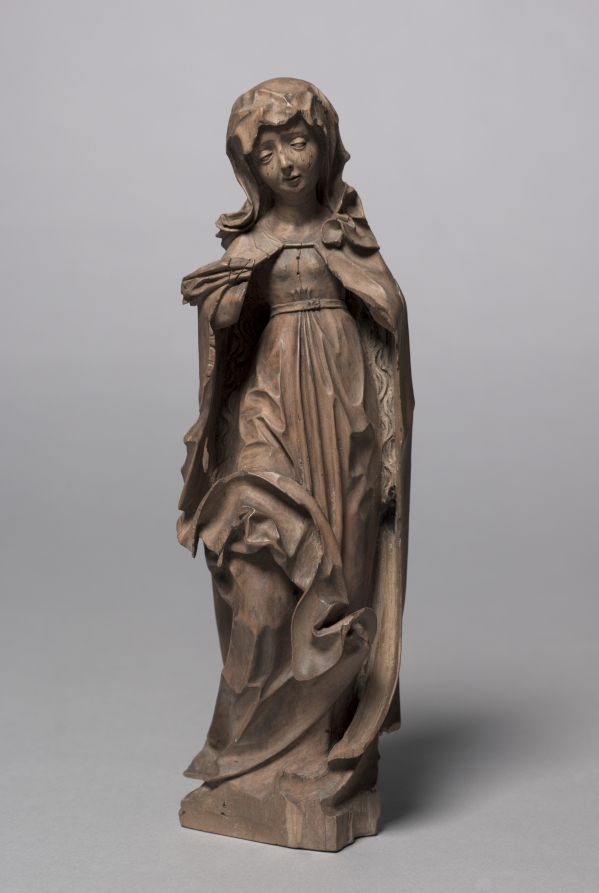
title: Mourning Virgin from a Crucifixion Group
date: about 1620/40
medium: pearwood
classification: Sculpture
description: This statuette once formed part of a Crucifixion group intended for a domestic shrine or chapel. Such ensembles were not only used for private devotion and meditation, but were also collected as works of art. This work was long attributed to the Nuremberg artist Veit Stoss. In fact, the carver imitated forms from his repertoire. However, the concave folds do not occur before 1600. The sculpture was created at a time when the appreciation for Albrecht Dürer, the most famous German painter of his time, was also experiencing a renaissance.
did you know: Looking closely, you can see that the sculptor carved tears under Mary's eyes. They show her pain over Christ hanging on the cross.